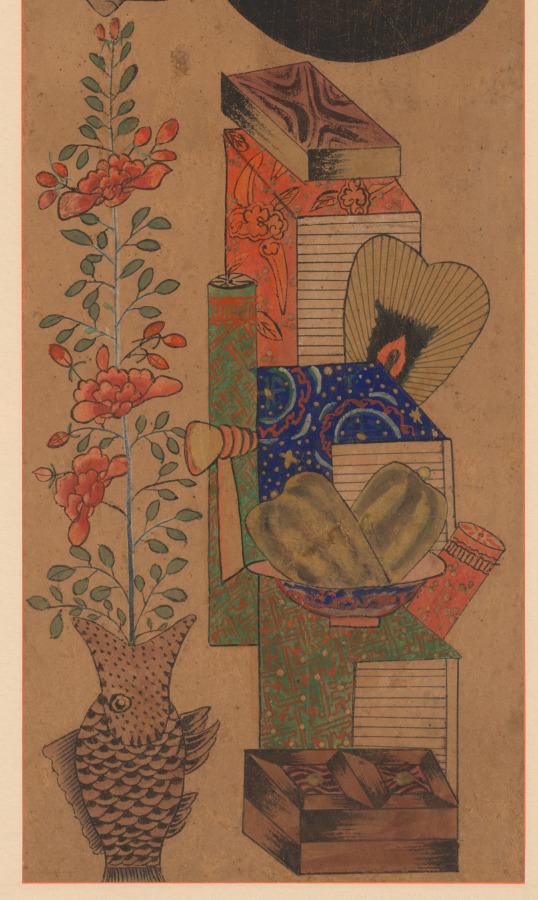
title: Munja-Chaekgeori Screen (Character-Books Screen)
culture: Korea, Joseon dynasty (1392–1910)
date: early 1900s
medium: Eight-panel folding screen, ink on paper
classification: Painting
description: This folding screen is a whimsical harmony of two different subjects: chaekgeori, or books and things; and munja, or characters. The lower section of each panel depicts the imagery of things, including books, decorative arts, and utilitarian objects. The upper portion of each panel bears a classical Chinese character. Read from far right to left, the eight characters refer to the values of Confucian teachings of the Joseon dynasty: filial piety, brotherly love, loyalty, trust, propriety, righteousness, modesty, and humility. While these two pictorial genres are harmoniously conjoined on the same picture plane, two sharply contrasting world views—urban consumerism and traditional Confucian ethics that despise materialism—compete with one another.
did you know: The eight Korean characters each mean filial piety, brotherly love, loyalty, trust, propriety, righteousness or justice, modesty or integrity, and humility or the feeling of shame.